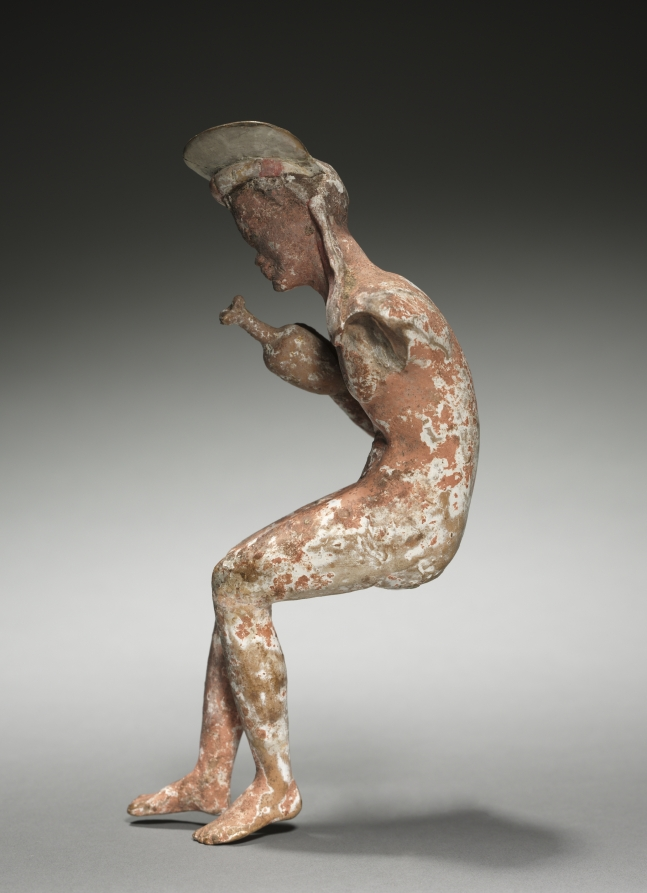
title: Seated Man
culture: Greece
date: 400–300 BCE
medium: painted terracotta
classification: Sculpture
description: This statuette takes the form of a seated male figure, nude but for a large headdress or hat with a yellow and red–striped ribbon beneath it. The ends of the ribbon trail down over each shoulder. In his right hand he holds a pitcher, and his left arm is missing below the shoulder. His entire body is painted a pinkish red over a white slip.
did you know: The pitcher in the figure’s hand, called an oinochoe, was used in ancient Greece to pour wine.